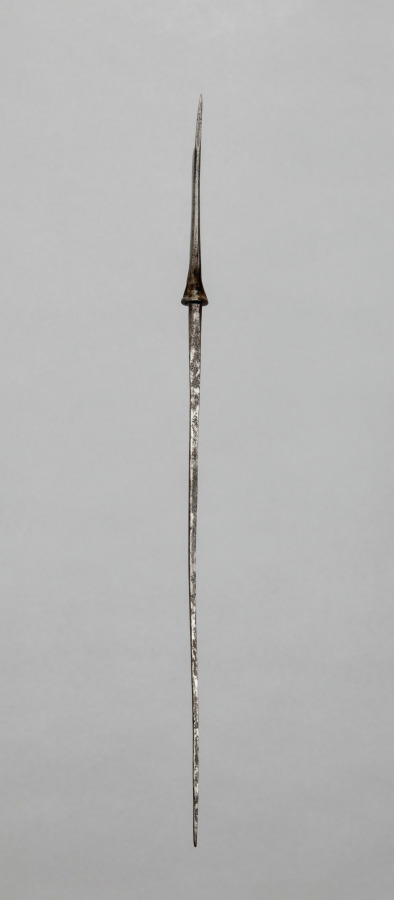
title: Arrow Point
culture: Japan, Edo period (1615–1868)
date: 1700s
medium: steel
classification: Arms and Armor